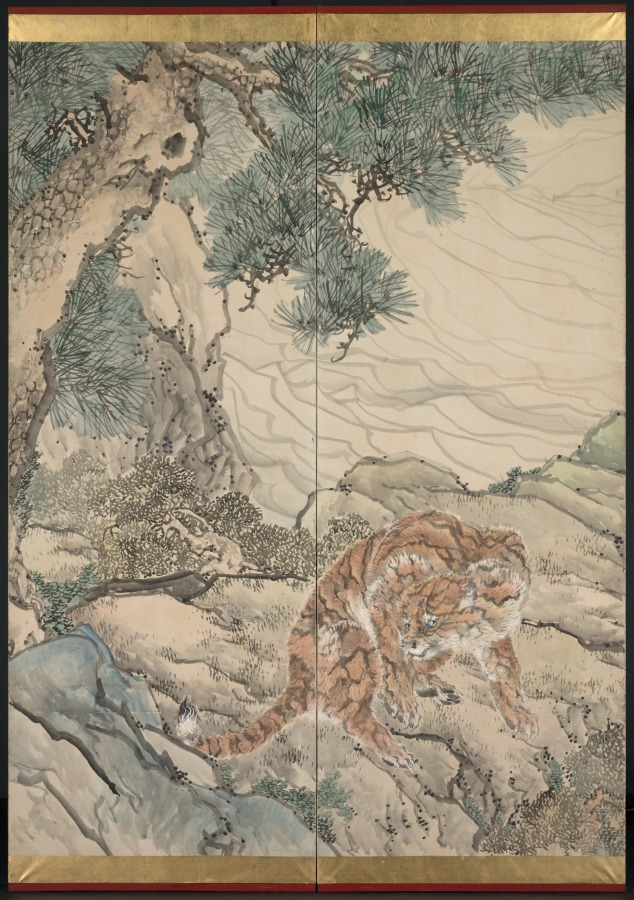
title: Tiger Family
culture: Japan, Edo period (1615–1868)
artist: Kishi Ganku (Japanese, 1749/56–1838)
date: early 1800s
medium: One of a pair of six-panel folding screens; ink and color on paper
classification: Painting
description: By the time this self-taught painter reached his thirties, his paintings were keenly sought after by Kyoto’s sophisticated patrons, including members of the imperial family. Judging from the surviving works, his supporters delighted in the colorful, auspicious imagery of Chinese historical figures, blossoming plum trees, cranes, peacocks, roosters, and especially tigers. Kishi Ganku was originally from the coastal town of Kanazawa, but relocated to Kyoto to work for the Arisugawa family. His work incorporates stylistic elements from the Kano school, the Maruyama school, and works by the Chinese artist Shen Nanping (1682–1760).